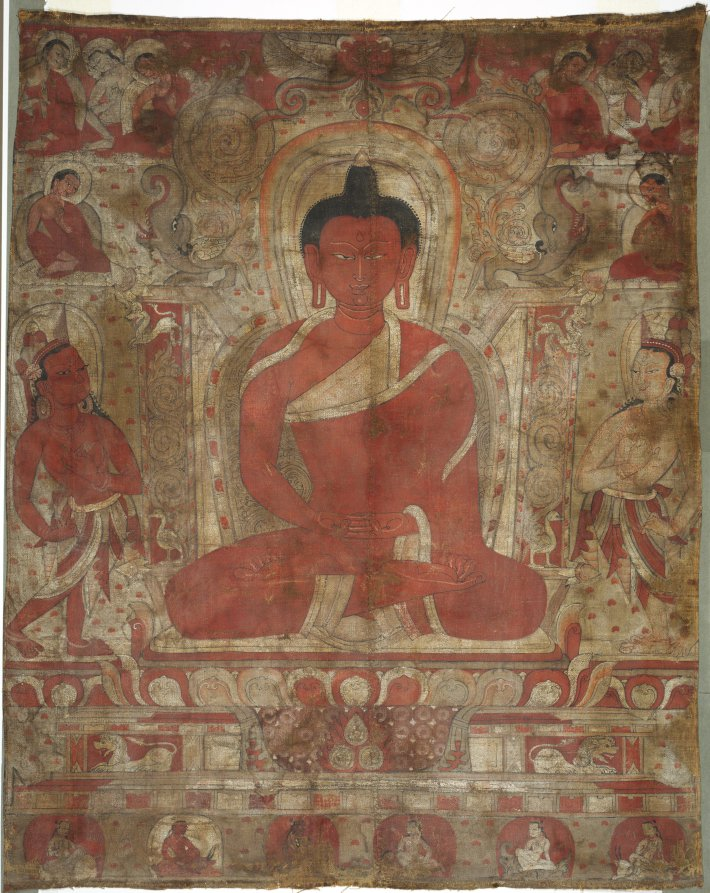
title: Seated Amitabha with Attendants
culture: India, Western Himalayas, Lahul and Spiti, Tabo Monastery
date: c. 1100s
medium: Gum tempera and ink on sized cotton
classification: Painting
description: The red Buddha of the West, Amitabha, seated in meditation on his throne, is flanked by bodhisattvas. Above are two rows of monks who transmit his teachings, and along the bottom is a row of six adepts, skilled practitioners of magic and the recitation of mantras to reach enlightenment quickly. In front of his throne are the three flaming jewels of Buddhism: the Buddha, his teaching (dharma), and the spiritual community (sangha). Its unfinished state reveals the fluid and accomplished ink drawing delineating all the forms. This painting is one of the earliest surviving thangkas—devotional Buddhist paintings on cloth. It is from the region ruled by the Guge kings of western Tibet from the 900s to 1600s, now partially within the national borders of India.